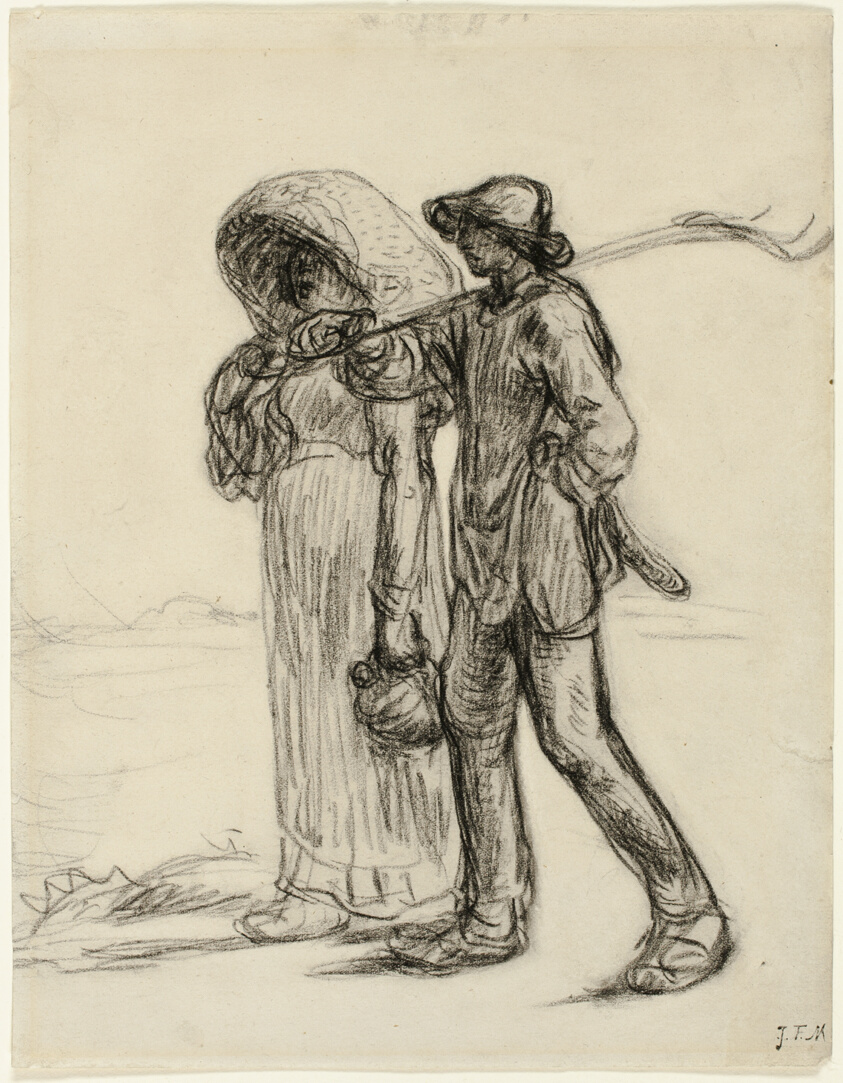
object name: Drawing and Watercolor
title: Peasants Going to Work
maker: Jean François Millet (French, 1814-1875)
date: 1863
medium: Black crayon on paper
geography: France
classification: crayon; drawings (visual works); prints and drawing